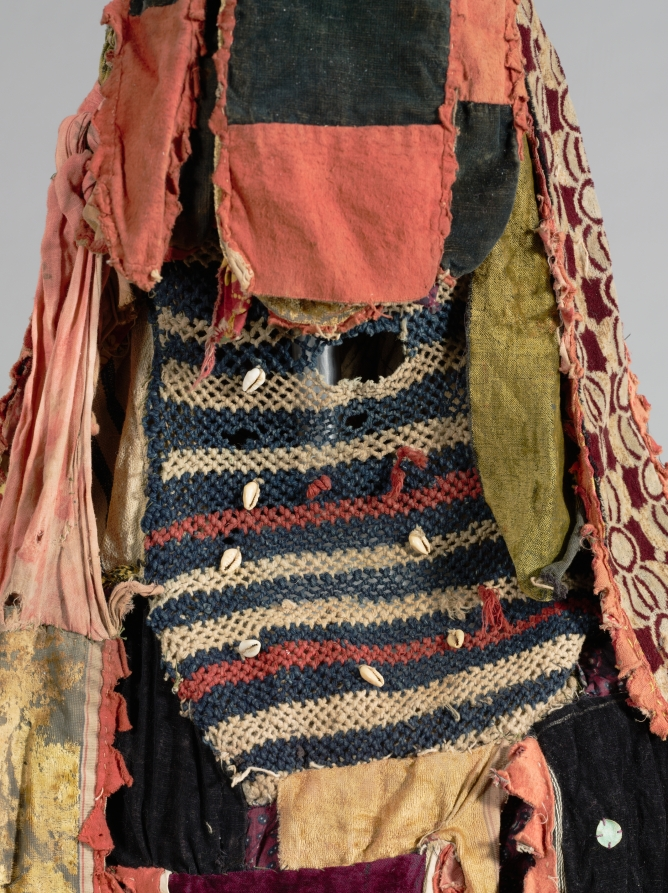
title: Egúngún Masquerade Dance Costume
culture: Africa, West Africa, Nigeria, Yorùbá-style maker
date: 1900s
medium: cotton, velvet, flannel, leather, dye, probably wood, cowrie shells, metal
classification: Mask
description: Swirling into motion, egúngún masquerade costumes appear during annual festivities to bless the community. Manifesting ancestral spirits, they serve as a bridge between the living and the otherworld. The fabric panels create a dwelling place for ancestral spirits. Arranged and selected according to Yorùbá design sense (ojú-ọnà), this mask incorporates hundreds of African, Asian, and European fabrics. These include imported damasks, velvets, faux furs, and embroideries, as well as local indigo-dyed cottons.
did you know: This masquerade costume is made from both imported and locally made fabrics.